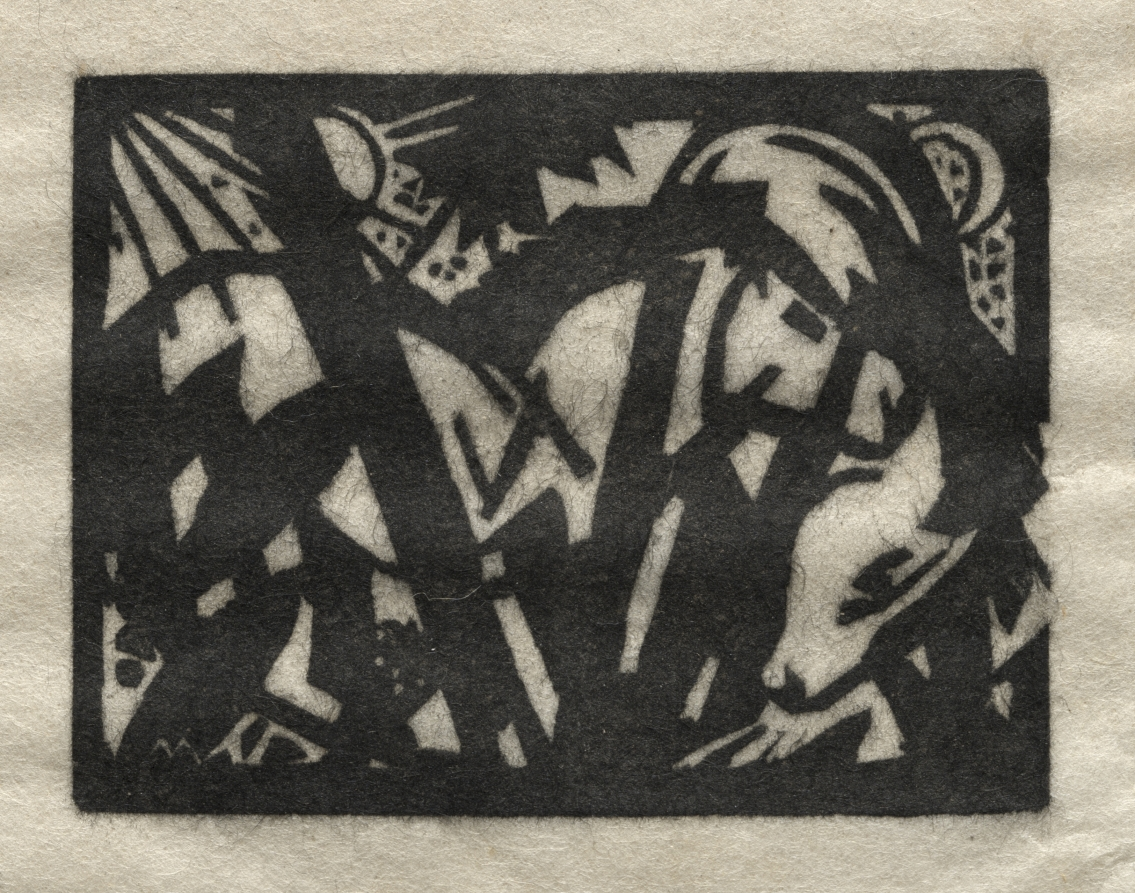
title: Horse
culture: Germany, 20th century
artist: Franz Marc (German, 1880–1916)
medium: woodcut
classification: Print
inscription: notations in graphite in lower margin